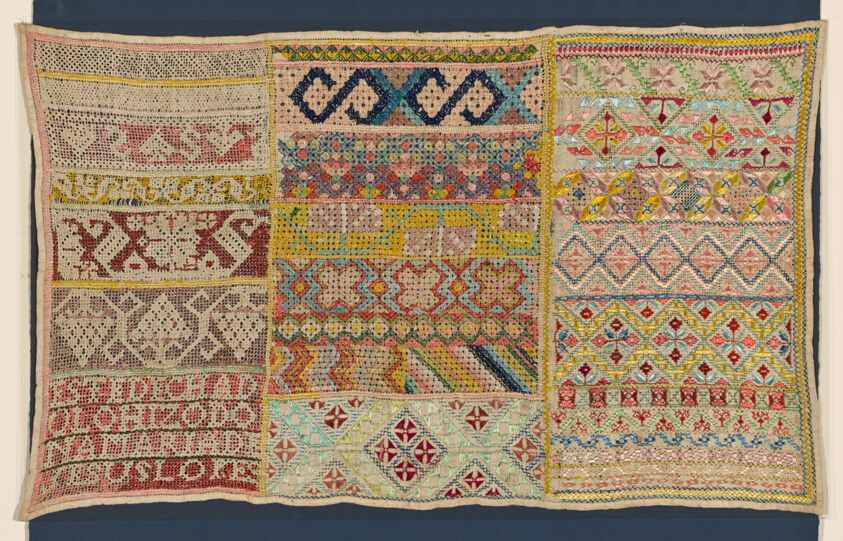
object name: Textile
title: Sampler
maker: Mexico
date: 1825/75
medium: Linen, plain weave; pulled thread work embroidered with silk and linen in buttonhole, hem, interlocking lace, overcast, Russian overcast, and simple loop stitches; embroidered in double running and satin stitches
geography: Mexico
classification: textile; needlework (visual works); sampler